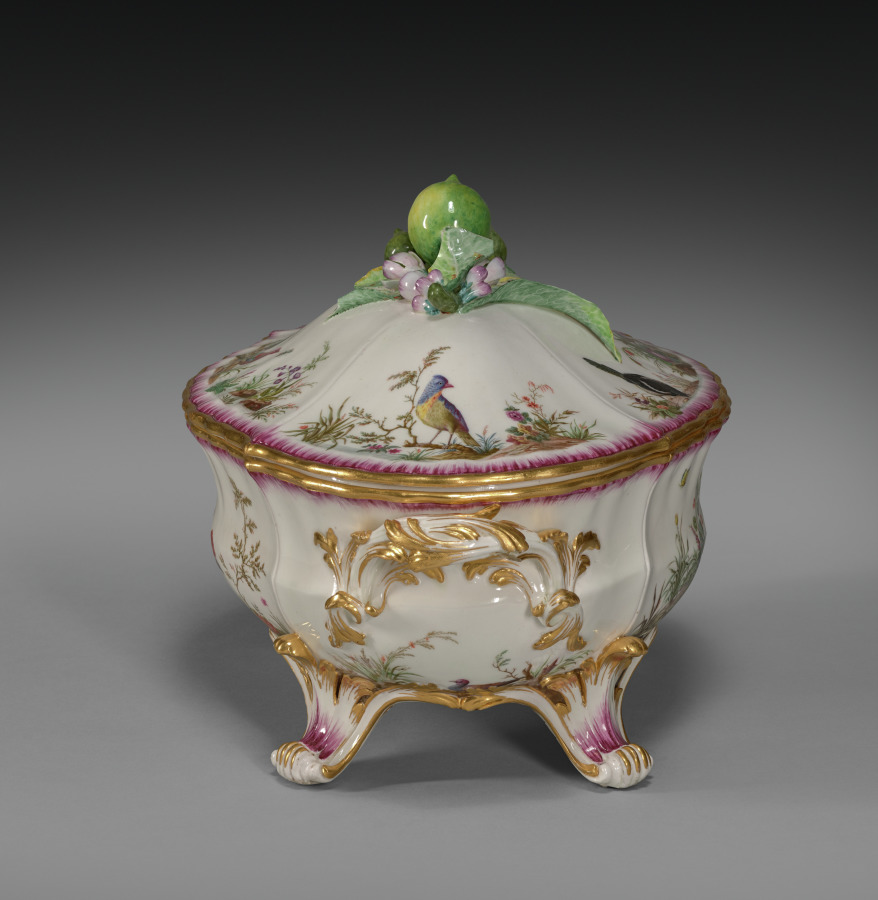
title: Covered Tureen (Terrine ancienne or Terrine ordinaire)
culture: France, Vincennes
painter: attributed to Louis-Denis Armand (French, active c. 1745–1783)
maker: Vincennes Porcelain Factory (France, 1740–56)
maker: probably by Jean-Claude Duplessis le Père (French, 1690–1774)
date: c. 1752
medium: soft-paste porcelain with enamel and gilt decoration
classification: Ceramic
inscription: [Interlaced foliate 'L's surmounted by a fleur-de-lys (indicating royal commision), in blue]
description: The intricately painted birds that decorate this tureen are the work of Louis-Denis Armand. Armand was known for his depictions of birds and landscapes, a specialty that may have come from his work as a painter of lacquered furniture with similar compositions. This tureen was likely designed by master goldsmith Jean-Claude Duplessis who began working as an artistic director at the Vincennes Porcelain Factory in 1748.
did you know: This object was manufactured in soft-paste porcelain, a material used by many European porcelain factories before they were able to emulate the hard-paste porcelain of China and Japan.